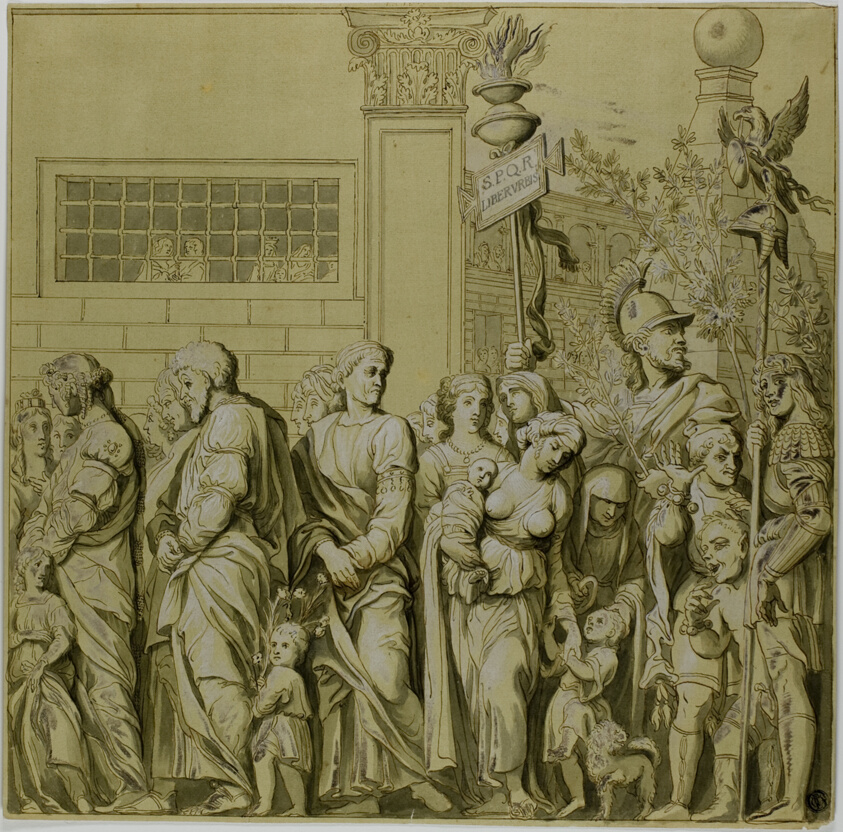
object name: Drawing and Watercolor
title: Triumphs of Julius Caesar: Canvas No. VII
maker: After Andrea Mantegna; Italian, 1431-1506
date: 18th century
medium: Pen and brown ink, with brush and gray wash, heightened with lead white (oxidized), on cream laid paper prepared with yellow wash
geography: Italy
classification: pen and ink drawings; drawings (visual works); prints and drawing